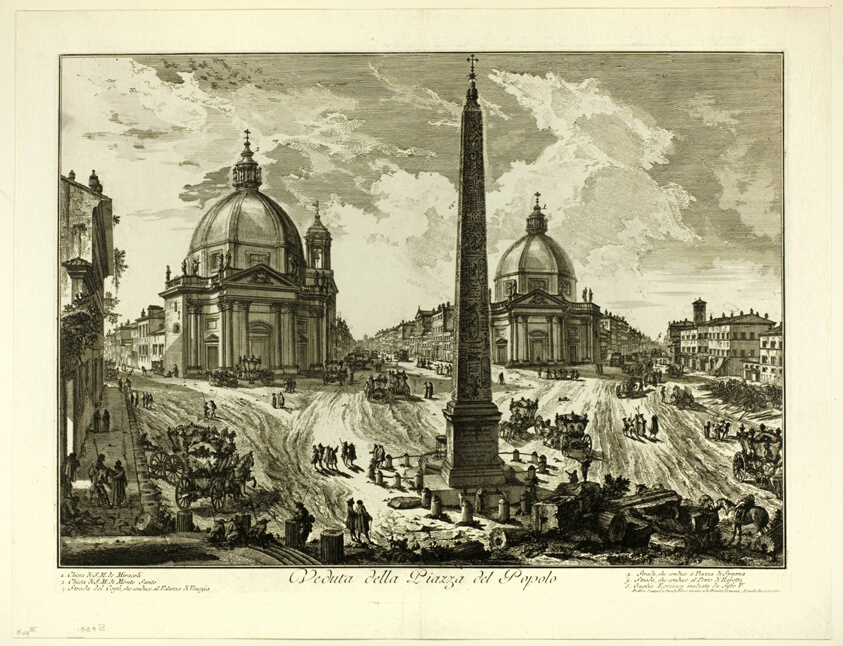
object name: Print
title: View of the Piazza del Popolo, from Views of Rome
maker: Giovanni Battista Piranesi (Italian, 1720-1778)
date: 1750/59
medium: Etching on heavy ivory laid paper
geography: Italy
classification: etching; print; prints and drawing